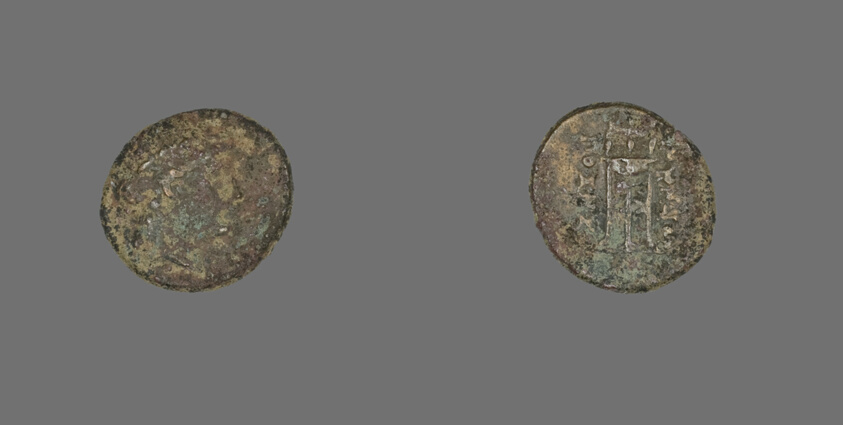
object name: Coin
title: Coin Depicting the God Apollo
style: greek, ancient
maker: Greek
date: 200-133 BCE (?)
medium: Bronze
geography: Ancient Greece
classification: coin; ancient art